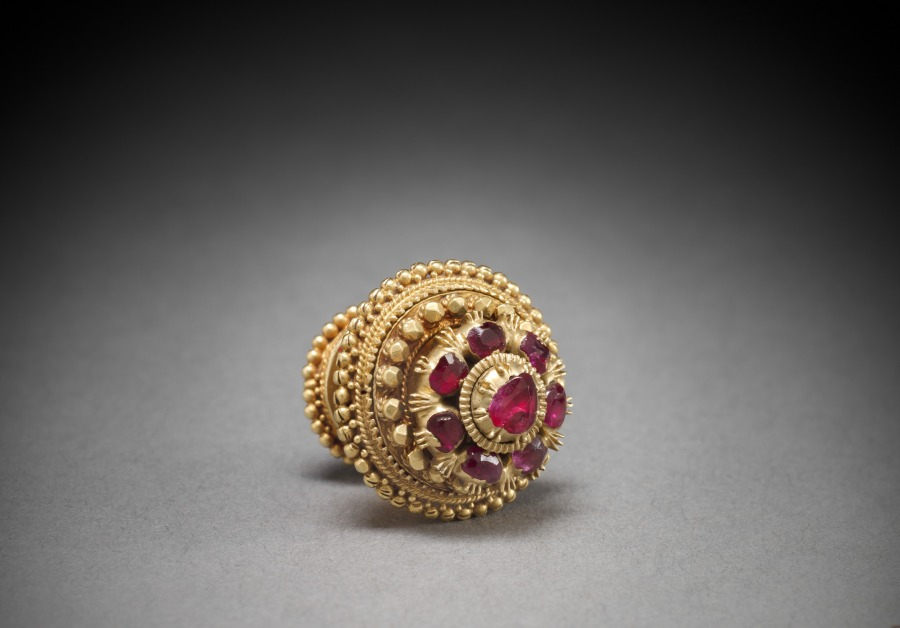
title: Ear Stud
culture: Burma (?)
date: 1800s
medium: gold and rubies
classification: Jewelry